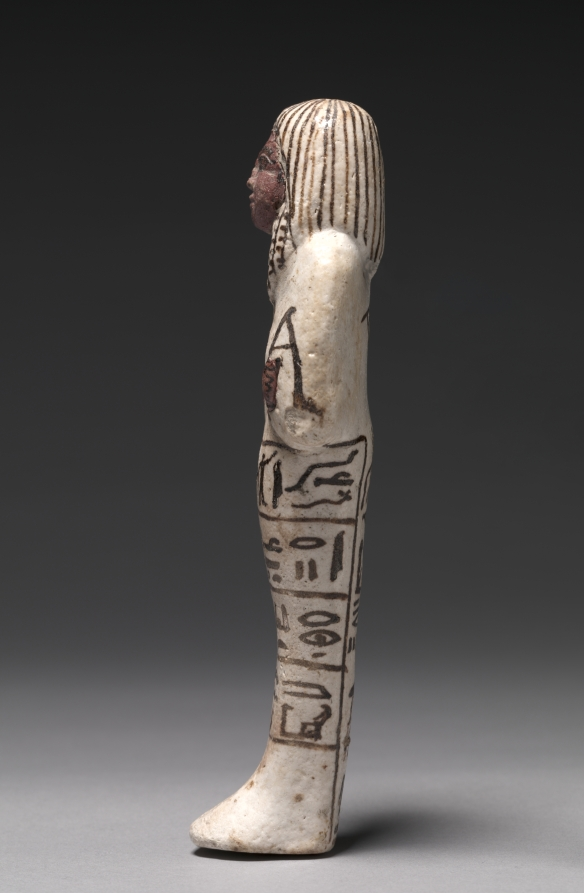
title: Shawabty of Djehutymose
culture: Egypt, New Kingdom (1540–1069 BCE), Dynasty 19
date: c. 1279–1213 BCE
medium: polychrome faience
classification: Funerary Equipment